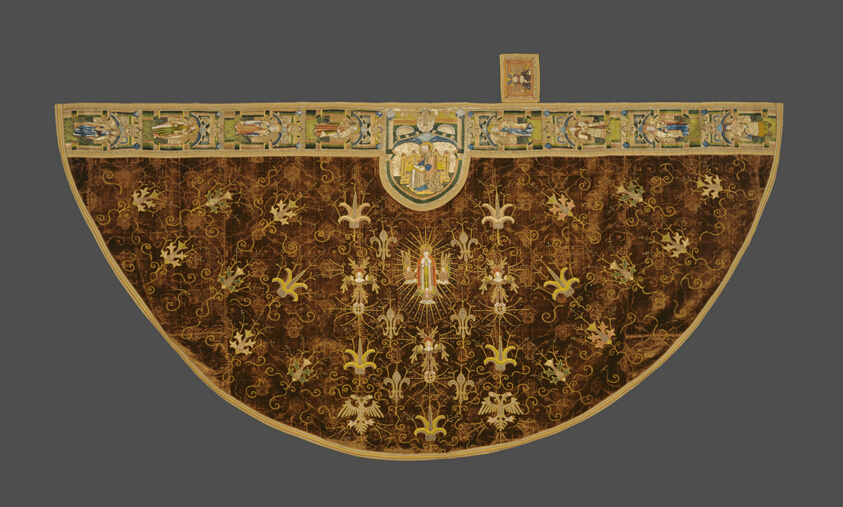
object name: Religious/Ritual Object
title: Cope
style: medieval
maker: England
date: 1490-1525, with later restoration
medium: Silk cut and voided velvet, linen appliqué, silk and gilt metallic thread embroidery, and metal spangles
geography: England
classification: liturgical; needlework (visual works); textile; ritual objects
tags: Christianity, Virgin Mary, saints, Saint Paul, prophets, biblical, angels, eagles, fleur de lis, thistles